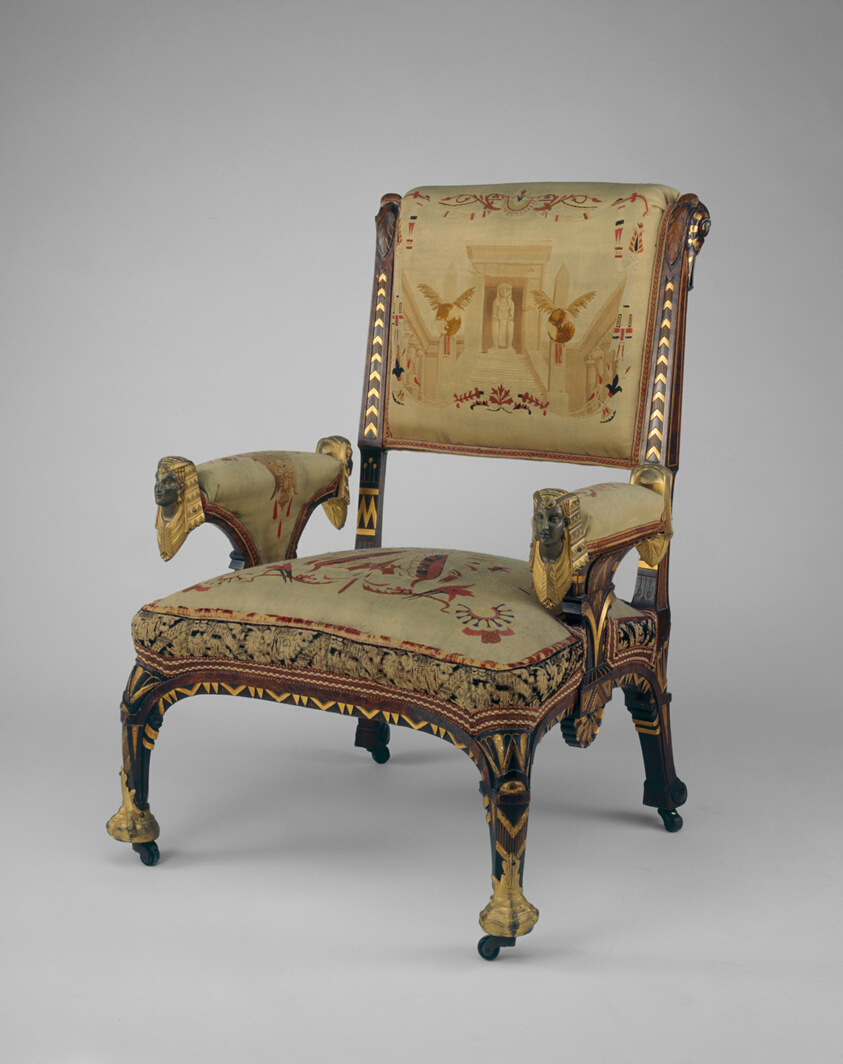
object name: Furniture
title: Armchair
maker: Attributed to Pottier and Stymus (American, active 1859–1888); Ormolu mounts by Pierre E. Guerin (American, founded 1857); New York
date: 1870–75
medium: Rosewood with ash, juniper and burl maple veneer, ormolu mounts, and woven tapestry upholstery fabric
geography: New York City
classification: seating; furniture; american decorative arts; american arts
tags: furniture